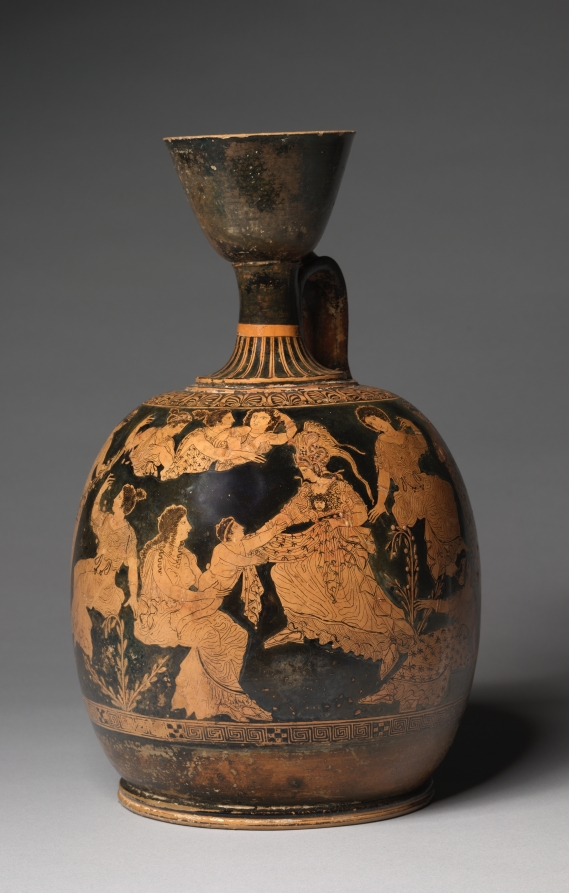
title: Red-Figure Squat Lekythos (Oil Vessel): Birth of Erichthonios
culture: Greek, Attic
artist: attributed to Meidias Painter (Greek, Attic, active c. 420–400 BCE)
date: c. 420–410 BCE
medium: ceramic, with gilding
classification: Ceramic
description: The central group on this vase shows the seated earth goddess Ge (also known as Gaia) handing her baby, Erichthonios, to Athena. Conceived from the seed of Hephaistos, Erichthonios would go on to become a king of Athens, and the story of his birth became popular in Athenian art of the fifth century BC. Other representations include Hephaistos as well as Kekrops, the mythical first king of Athens, sometimes together with Zeus and other deities. But this one includes only female onlookers—likely the three daughters of Kekrops watching from above, with Aphrodite and several abstract personifications such as Peitho (Persuasion) and Eudaimonia (Happiness) standing and seated nearby.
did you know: A lead rivet sits at the junction of handle and neck, probably an ancient repair.